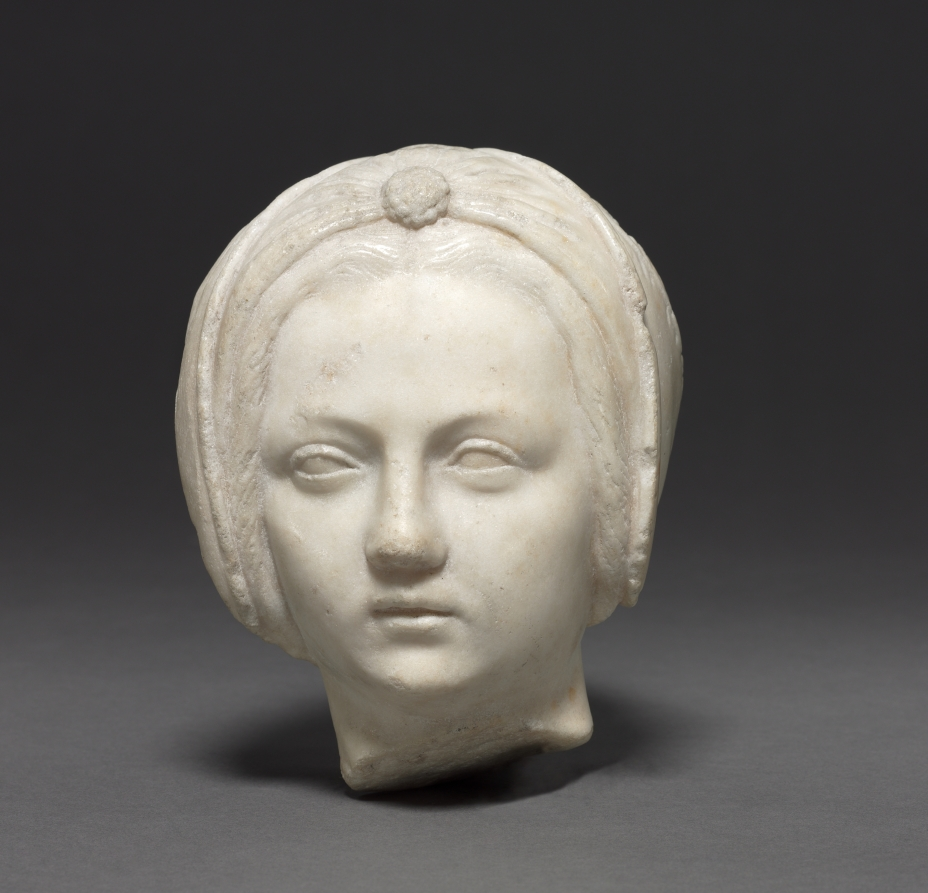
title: Head of a Woman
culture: France, 15th century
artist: circle of Michel Colombe (French, c. 1430–c. 1513)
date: c. 1500–1525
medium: marble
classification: Sculpture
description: The original context and function of these two marble heads are unknown. They are presumed to have been part of a relief sculpture from a château, perhaps in the Loire region, or else from a tomb sculpture. Their style is reminiscent of sculptures produced by Michel Colombe, a prominent sculptor active in the Loire Valley in the service of aristocratic and royal patrons, and may have been carved by a close follower or member of his workshop.